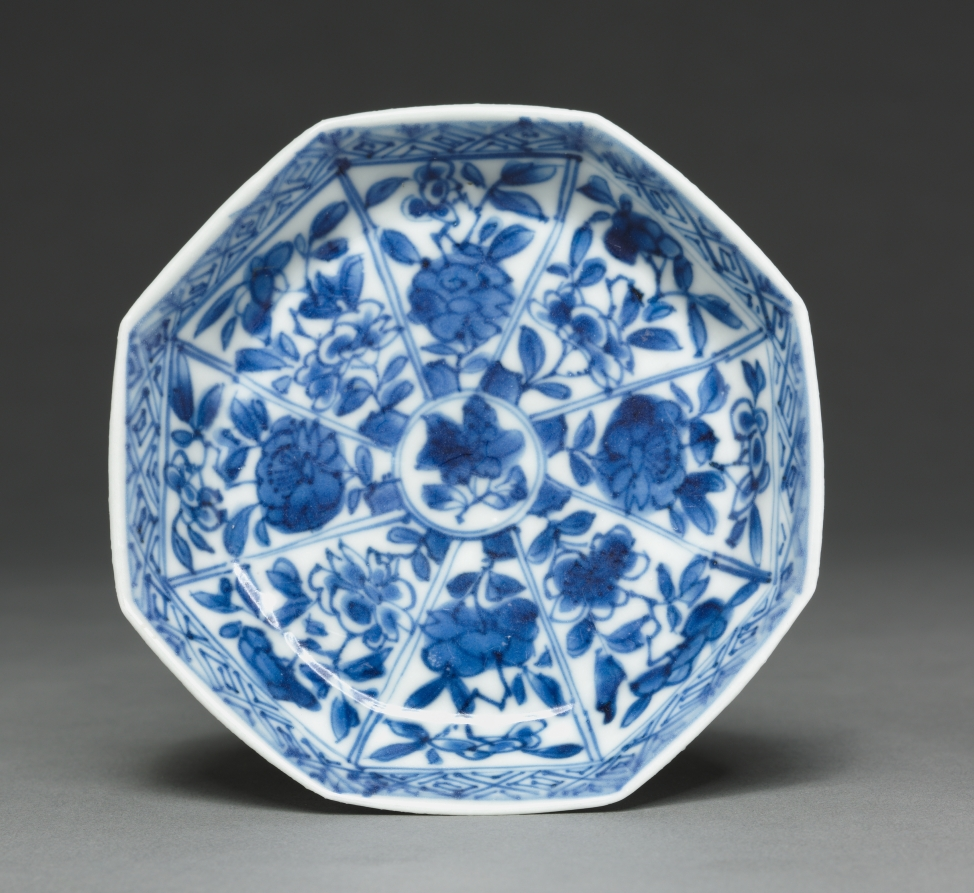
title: Saucer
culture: China, Qing dynasty (1644-1911)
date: c. 1690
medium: porcelain with blue and white decoration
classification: Ceramic